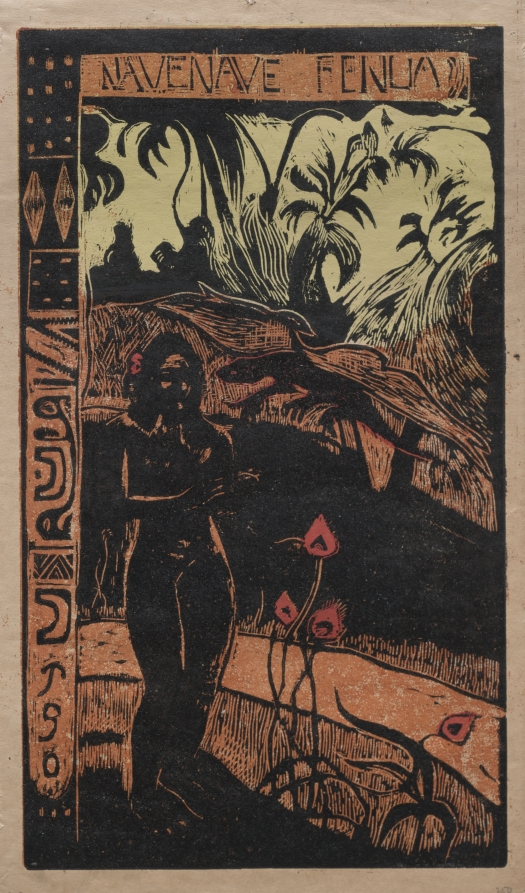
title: Nave Nave Fenua (Fragrant Isle)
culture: France, 19th century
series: Noa Noa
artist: Paul Gauguin (French, 1848–1903)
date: 1893–94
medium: color woodcut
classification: Print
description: In 1891 Paul Gauguin traveled to Tahiti, seeking a more authentic style of art making than the conservatism he rejected in Western culture. After returning to Paris in 1893, he began working on Noa Noa, an illustrated book that explained and illustrated his experiences abroad. Although the project was never completed, this print is one of its illustrations. Gauguin depicted a lush landscape by chiseling roughly into a woodblock, a technique meant to suggest relief sculpture he viewed in Tahiti.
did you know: Paul Gauguin printed the woodblocks for Noa Noa using a variety of inks and papers.